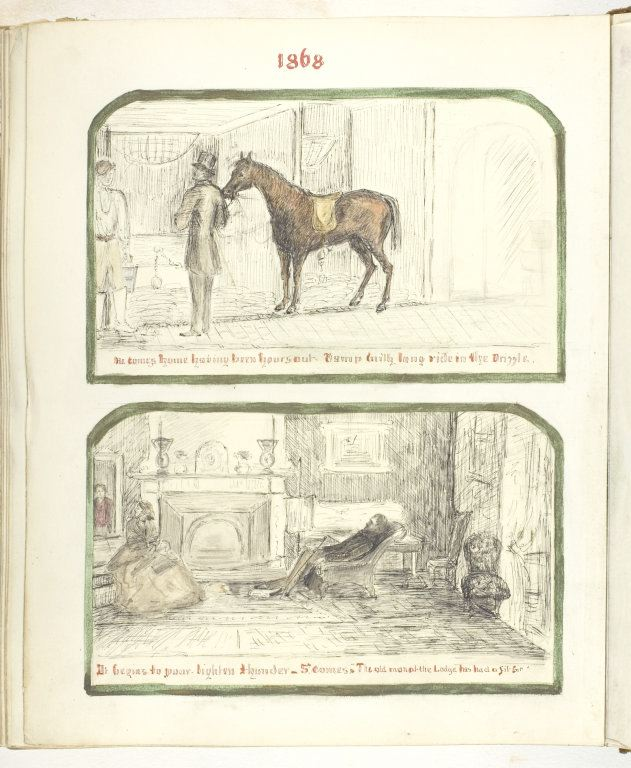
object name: Photograph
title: Untitled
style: 19th century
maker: Georgina Cowper, attributed; English, mid 19th century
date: 1868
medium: Ink and watercolor on paper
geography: England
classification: photograph; photography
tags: Collected by Hugh Edwards, Untitled Album 1849-60, Auld Lang Syne